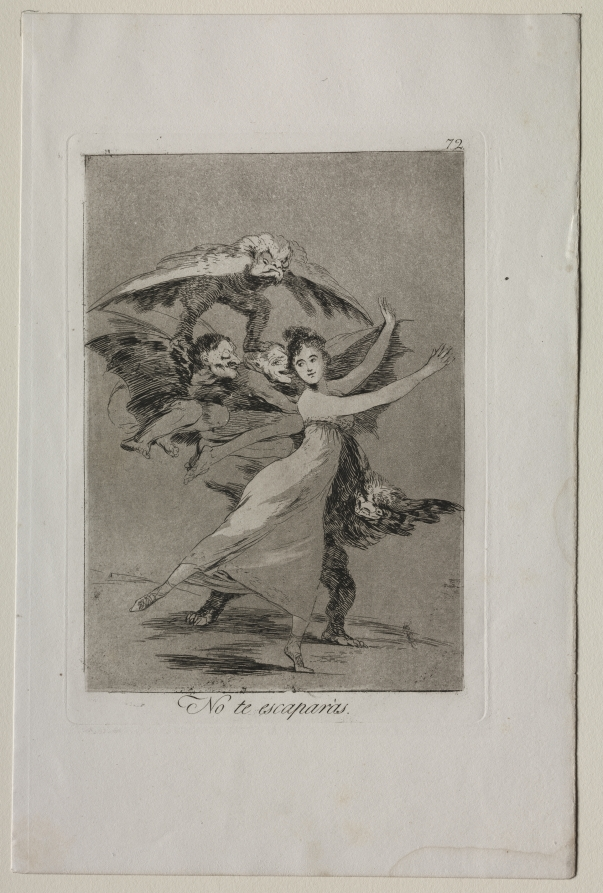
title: You Will Not Escape, Plate 72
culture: Spain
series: Los Caprichos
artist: Francisco de Goya (Spanish, 1746–1828)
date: 1799 (printed c. 1855)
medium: etching and aquatint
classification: Print